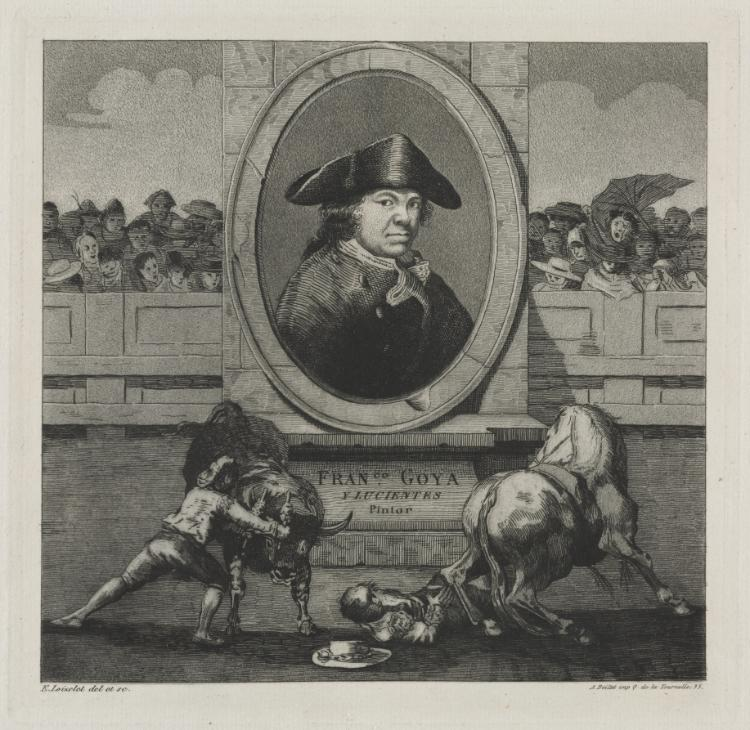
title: Bullfights: Frontispiece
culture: Spain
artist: Francisco de Goya (Spanish, 1746–1828)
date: 1816, printed 1876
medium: engraving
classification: Print